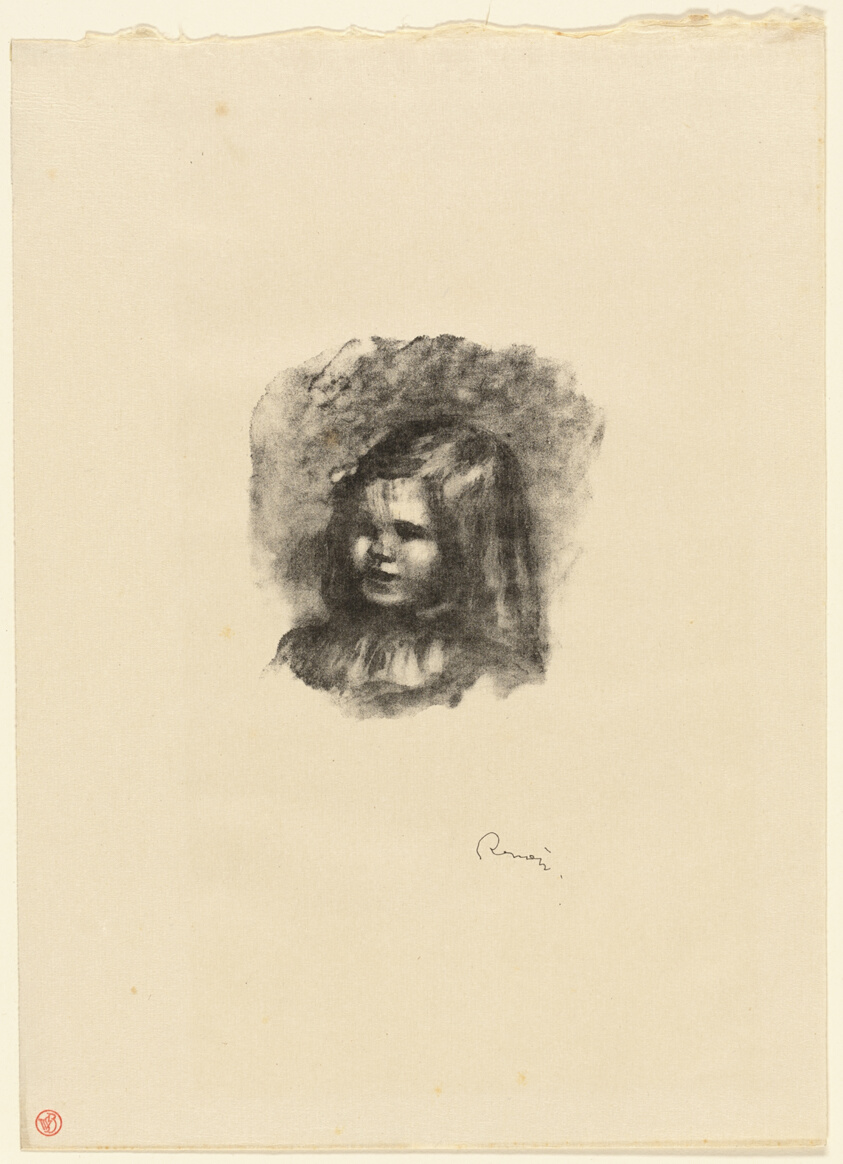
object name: Print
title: Claude Renoir, Turned to the Left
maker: Pierre Auguste Renoir (French, 1841-1919); printed by Auguste Clot (French, 1858-1936); published by Ambroise Vollard (French, 1835-1939)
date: c. 1904, published 1919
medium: Lithograph in black on cream Japanese paper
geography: France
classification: lithograph; print; prints and drawing